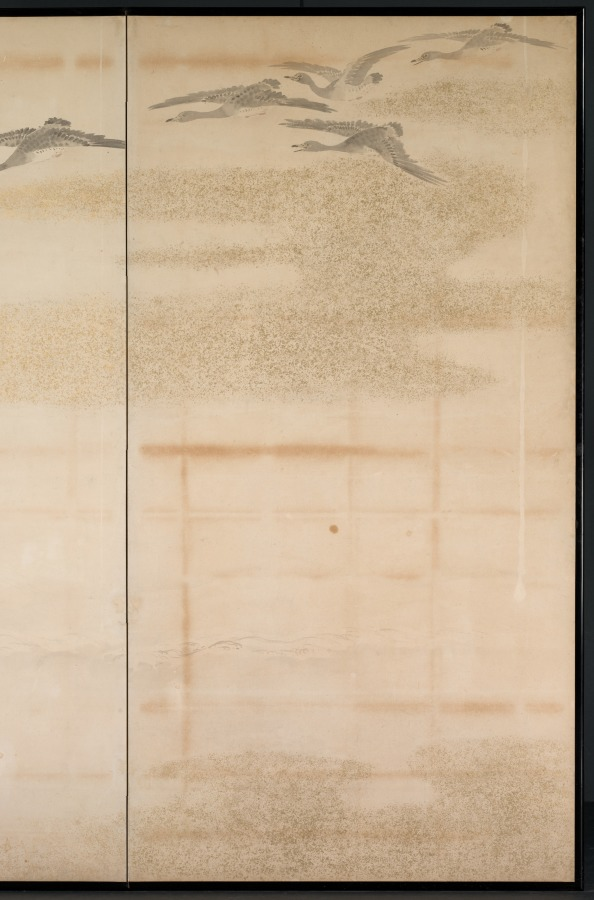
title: Geese, Reeds and Water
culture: Japan, Edo period (1615–1868)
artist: Yamamoto Baiitsu (Japanese, 1783–1856)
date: 1800s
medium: One of a pair of four-panel folding screens; ink, color, and cut gold foil on paper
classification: Painting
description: This byōbu composition differs from most in that it comprises two four-panel screens, rather than two six-panel units. Since the current mounting is modern, it is impossible to determine whether its present configuration represents its original design. Some panels may have been removed to help the screens better fit into a modern interior space. Baiitsu worked almost exclusively in monochromatic ink tones and favored classical Chinese painting themes.